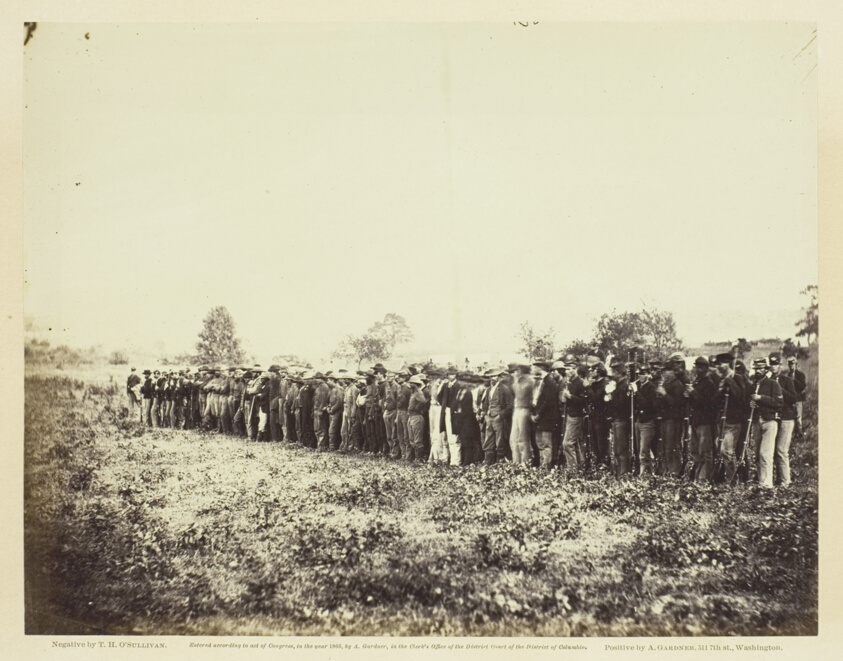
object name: Photograph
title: Group of Confederate Prisoners at Fairfax Court-House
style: 19th century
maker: Timothy O'Sullivan (American, born Ireland, 1840–1882)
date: June 1863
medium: Albumen print, pl. 34 from the album "Gardner's Photographic Sketch Book of the War, vol. 1" (1866)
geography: United States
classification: photograph; albumen silver print; photography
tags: Collected by Hugh Edwards, Gardner's Photographic Sketch Book